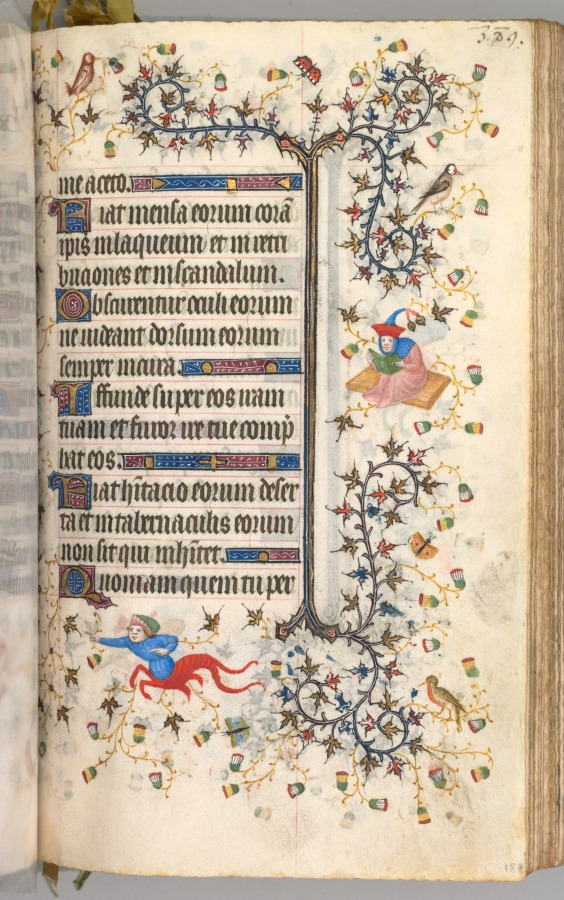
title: Hours of Charles the Noble, King of Navarre (1361-1425): fol. 189r, Text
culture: France, Paris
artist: Master of the Brussels Initials and Associates (French)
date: c. 1405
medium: ink, tempera, and gold on vellum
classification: Bound Volume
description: This precious volume was obviously highly prized by its owner, the French-born King of Navarre, who had his coat of arms painted on no less than twenty folios. Rather than directly commissioning this manuscript from a specific workshop, it seems that Charles the Noble acquired his book of hours -- perhaps ready-made for the luxury market -- while on a trip to Paris in 1404-05. A collaborative effort, six painting styles are evidenced within the pages of this codex, those of two Italians, two Frenchmen, and two Netherlanders. The painter who was responsible for the planning and decoration of the book, and who produced seventeen of the large miniatures, was a Bolognese artist known as the Master of the Brussels Initials. His principal assistant, responsible for most of the borders, was a Florentine who signed his name "Zecho" da Firenze on folio 208 verso.